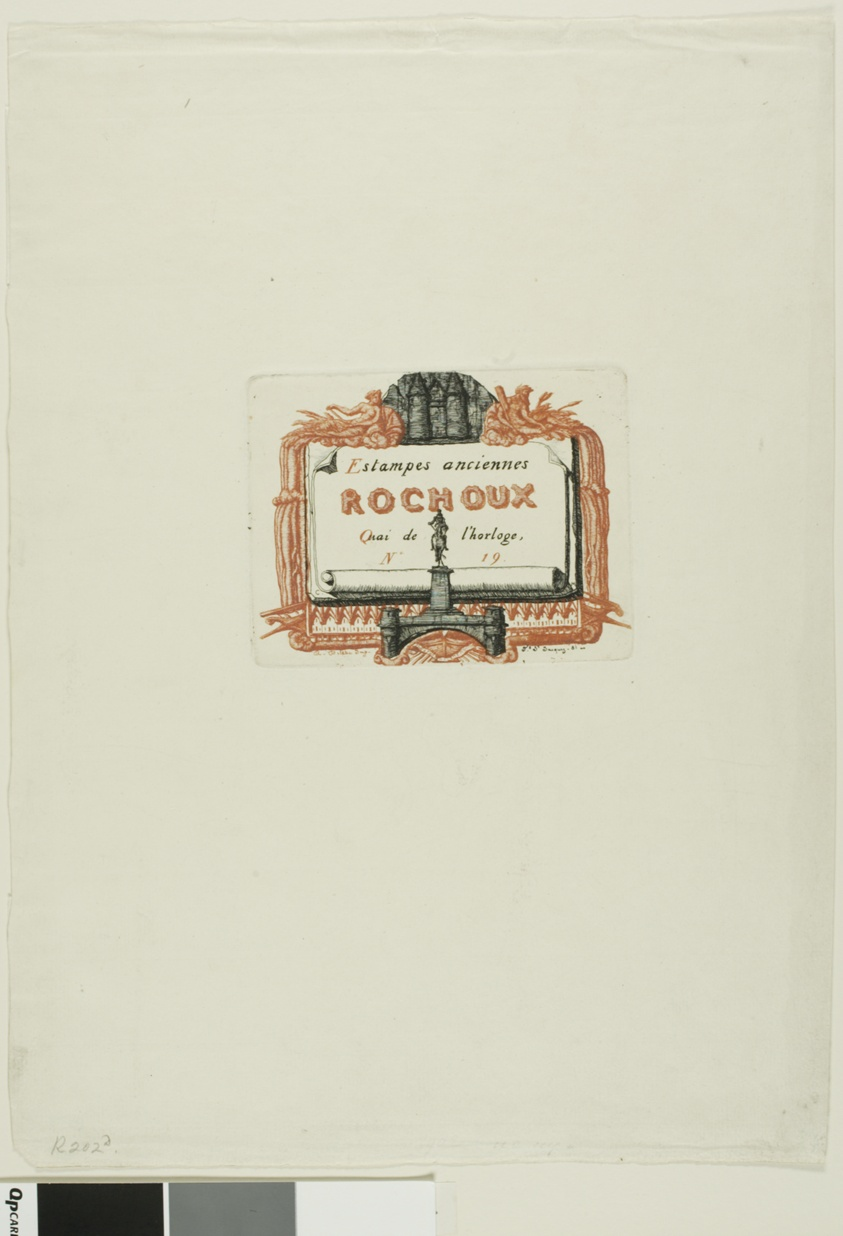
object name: Print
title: Address-Card of the Printseller, Rochoux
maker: Charles Meryon (French, 1821-1868); printed by Auguste Delâtre (French, 1822-1907)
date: c. 1855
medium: Etching, from two plates, one printed in black and the other in red, on ivory laid paper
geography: France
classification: etching; print; prints and drawing